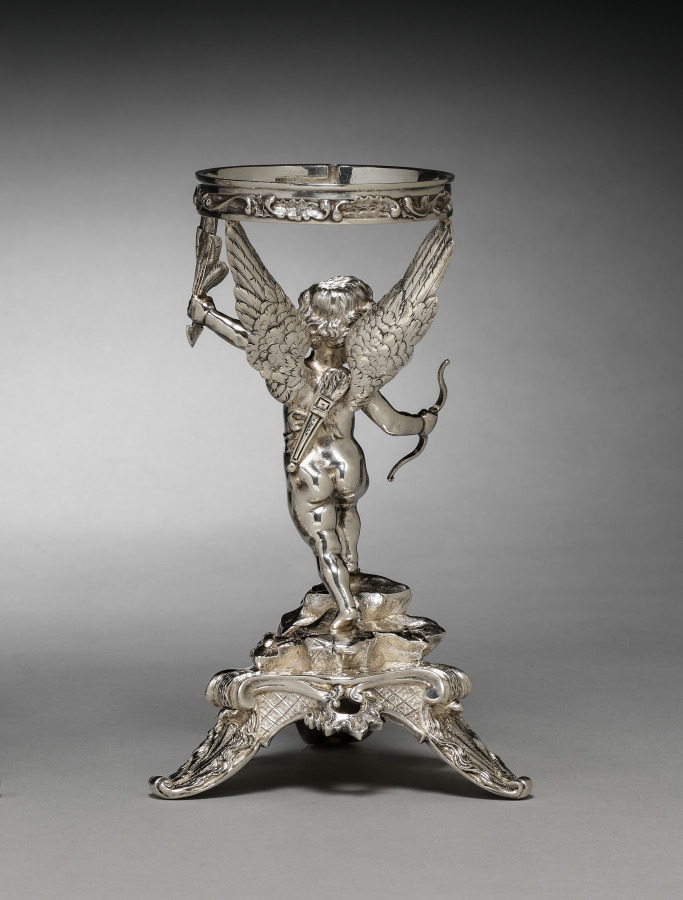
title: Stand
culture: Russian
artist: House of Fabergé (Russian, 1842–1918)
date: c. 1890–99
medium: silver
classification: Silver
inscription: Inscribed “K. Fabergé” in Cyrillic, surmounted by the double-headed Imperial eagle.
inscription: “88” silver standard